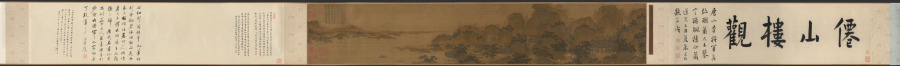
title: Waiting for the Moon in the Mid Autumn Festival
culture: China, Ming dynasty (1368–1644)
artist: Shi Rui (Chinese, c. 1400-c. 1470)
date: 1400s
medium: handscroll, ink, color, and gold on silk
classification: Painting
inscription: [印] 石氏以明; 游戯翰墨.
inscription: 僊山樓觀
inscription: 1 inscription, dated 1639, and 1 seal of Xiao Yuncong 蕭雲従 (1596-1673). Inscription by Xiao Yuncong: This is a painting by the Junior General Li. The painting is damaged and cracked at many places. Many of the paper strips for backing have been missing since long ago, but the colors are still fresh as if they had just been applied and the ink still looks moist. During the reign of Tianbao (742-756) of the Tang Dynasty, the Imperial Klansman Li Sixun was summoned to paint the walls of the Datong Hall. He was known as the "Senior General." His son, who came to be known as the "Junior General," was named Zhaodao. Of the stone epitaph [Li Sixun bei, or the "epitaph of Li Sixun," one of the best known calligraphic monuments of the Tang Dynasty], engraved with the calligraphy of Li Beihai 李北海 [Li Yong 李邕, 678-747], more than half has fallen off. Why, in contrast, was this painting able to survive? Or could it be that despite the fact that the stone is hard and the silk is soft, their preservation or destruction depends on some other factors? Moreover, since they were titled nobility of imperial descent, it is doubtful that they had the leisure and the mood to indulge in such decorative and descriptive blue and gold painting for the mere amusement of their fellow men. Recently, I read the Yi zhou ming hua lu 益州名畫錄 [by Huang Xiufu 黃休復, preface 1005]. I found a certain Li Chin-nu who compared himself with Li Zhaodao 李昭道 and was called by the Sichuan people the Junior General Li. In a painting which he did, entitled Mt. Ch'ing-ch'eng, the architectural structure of the pavilions, terraces, bridges, and boats are meticulous and accurate. The horsemen on a spring outing are as small as grain and the wild geese among the clouds as tiny as dust. It was also said that he painted on silk of any length in accordance to specific commissions. Is it possible that this painting is one of his? Since that time 700 years have passed. Yet one of the two Junior General Li's must be our painter. Formerly, there were the so-called "Four Excellents" in the Hall of Portraits of the Buddhist monk Wu-ta Kuo-shih: the [portrait] painting by Ch'ang Ts'an [act. ca. 881-888}, the calligraphy by Priest Tao-ying, the eulogy by Li Shangyin 李商隱 [813-858], and the landscape by Li Sheng [act. ca. 908-925]. This Li Sheng was styled Chin-nu and was also called Junior General Li. In the tenth month of the Chi-mao year, the twelfth year of the Chongzhen era [1639], recorded by Xiao Yuncong of Wuhu. trans. WKH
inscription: 4 colophons and 30 additional seals: 1 seal of Xu Qianxue 徐乾學 (1631-1694); 1 seal of Li Chien 黎簡 (1747-1799); 1 seal of Chang Chin-fang (18th c.); 2 seals of Sun Erzhun 孫爾準 (1770–1832); 1 colophon and 2 seals of Zhang Weiping 張維屛 (1780-1859); 1 seal of Wu Rongguang 吳榮光 (1773-1843); 1 colophon and 2 seals of Luo Tianchi 羅天池 (1826 jinshi); 7 seals of Wu Yanhui 伍元蕙 (active 1821–1851); 2 colophons and 4 seals of Pan Zhengwei 潘正煒 (1791-1850); 9 seals unidentified.